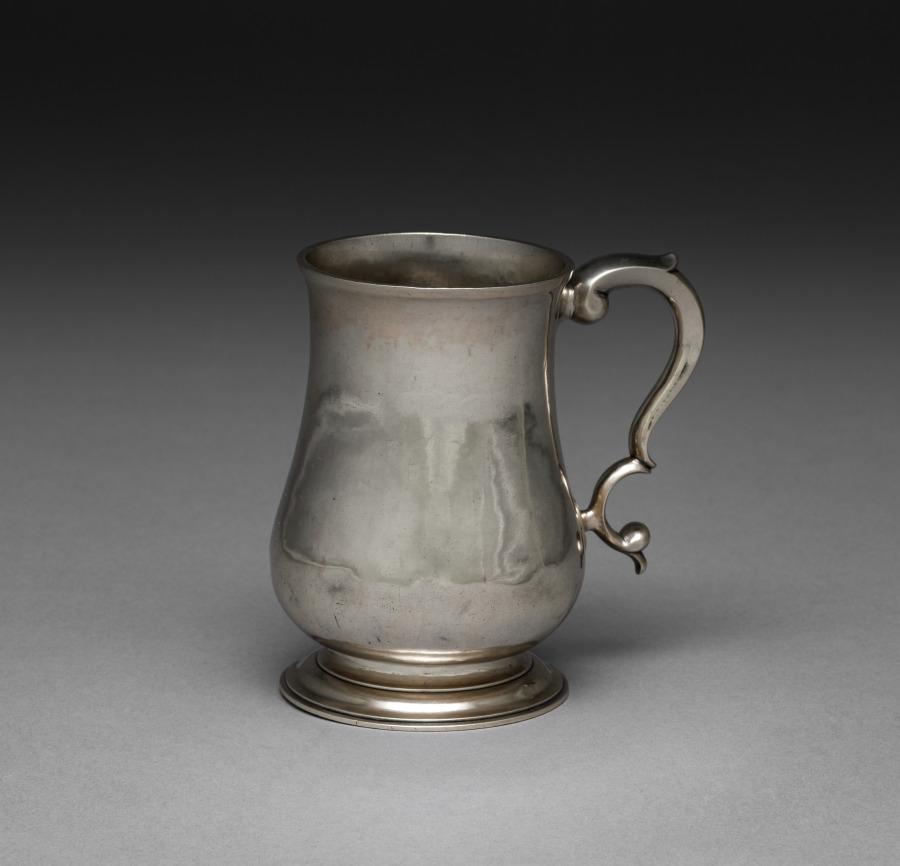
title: Cann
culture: America, Massachusetts, 18th century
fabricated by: Samuel Bartlett (American, 1752–1821)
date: c. 1775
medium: silver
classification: Silver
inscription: engraved "W" over "JH" in block letters on handle beneath thumbpiece.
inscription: Stamped underside: "S.B".